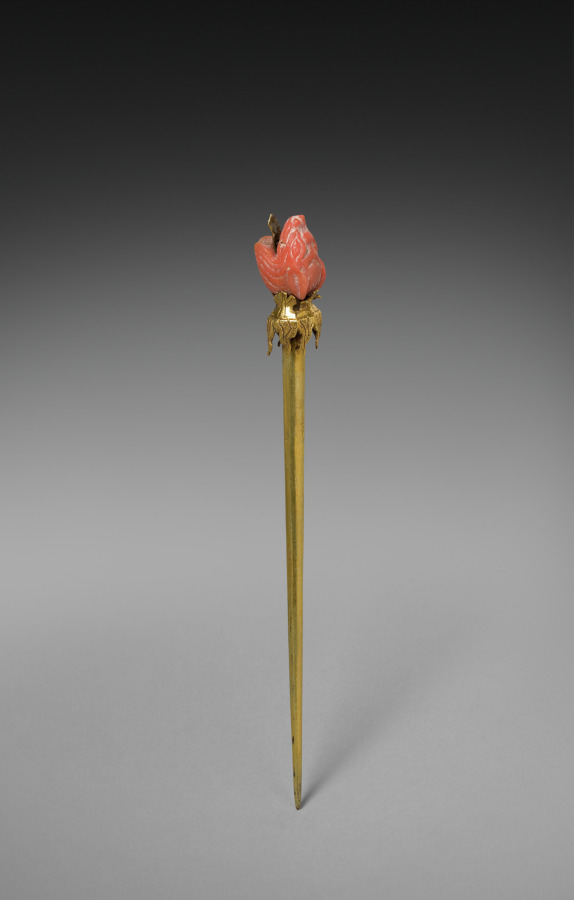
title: Detatchable Finial (Pick?) in Form of a Dragon's Head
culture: Italy, Venice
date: c. 1500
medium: enameled shell and coral, gilt-silver mounts; detachable pick with dragon's head finial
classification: Metalwork